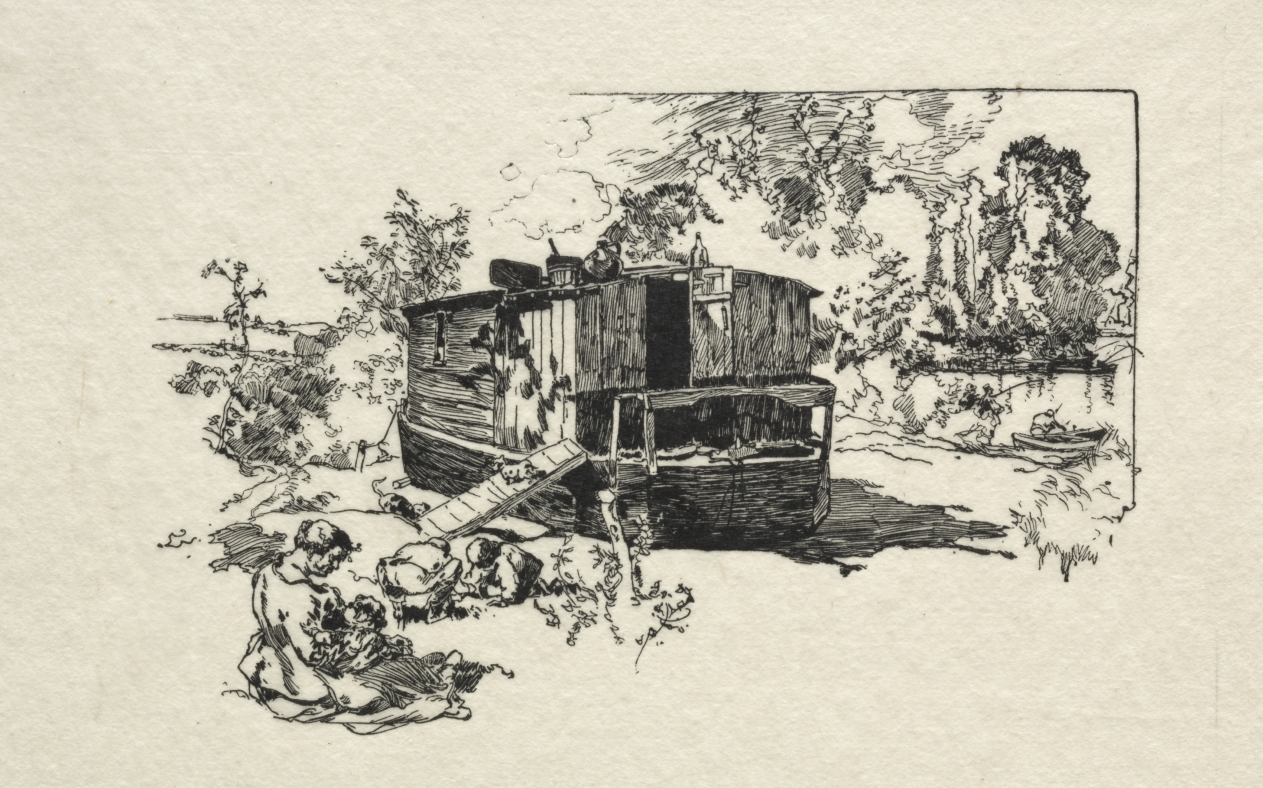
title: Bateau logement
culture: France, 19th-20th century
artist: Auguste Louis Lepère (French, 1849–1918)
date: c. 1870–1918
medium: wood engraving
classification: Print